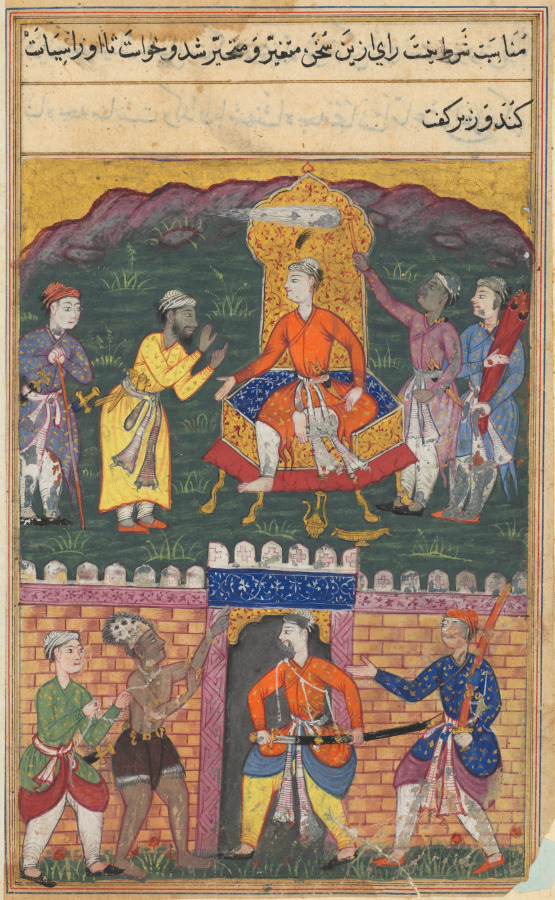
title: The vizier dissuades the king of Bahilistan from executing the dervish who asks for his daughter’s hand in marriage, from a Tuti-nama (Tales of a Parrot): Seventh Night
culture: Mughal India, court of Akbar (reigned 1556–1605)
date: c. 1560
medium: gum tempera, ink, and gold on paper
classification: Painting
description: A poor dervish, wearing a fur cap and short brown lower garment, stands captive before the furious king of Bahilistan. Before he can kill the dervish, a vizier reminds him that it is beneath a king to stain his sword with the blood of a mendicant. The dervish is ordered to prove his worth by offering the king’s daughter an elephant laden with gold.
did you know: Bahilistan was once an independent state in India.